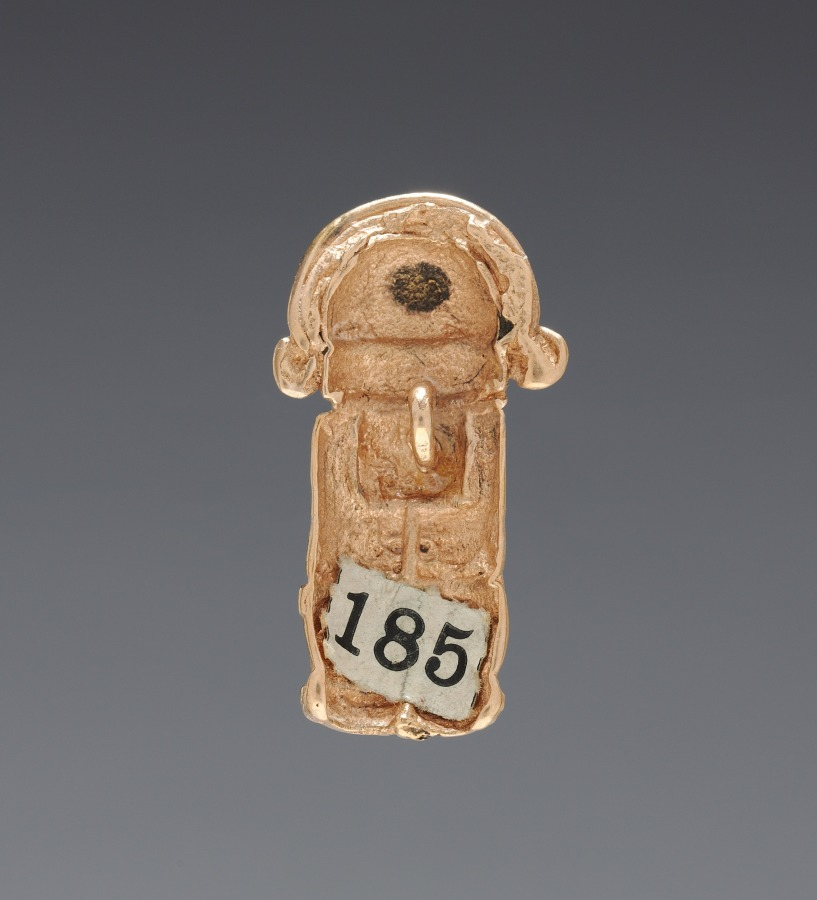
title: Necklace Figurine Bead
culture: Colombia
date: 1–700 CE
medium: cast gold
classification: Jewelry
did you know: Working with gold dates back to at least 500 BC in Ecuador and Colombia.